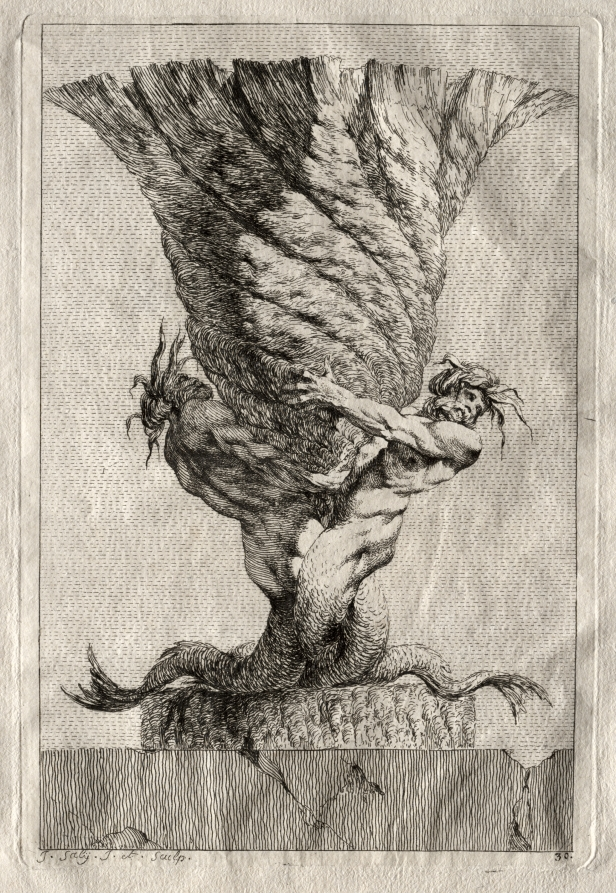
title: Suite of Vases: Plate 30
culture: France, 18th century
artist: Jacques François Saly (French, 1717–1776)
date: 1746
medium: etching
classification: Print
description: Designing ornamental vases or urns was particularly popular during the mid-18th century since the only limit to the possibilities was the imagination of the artist. Saly, a sculptor by training, was a student at the French Academy in Rome from 1740 to 1746, at which time he published a set of 30 etchings. Saly began with basic antique vase forms but deviated from classical ornament to use a rich variety of fantastic creatures for embellishment.